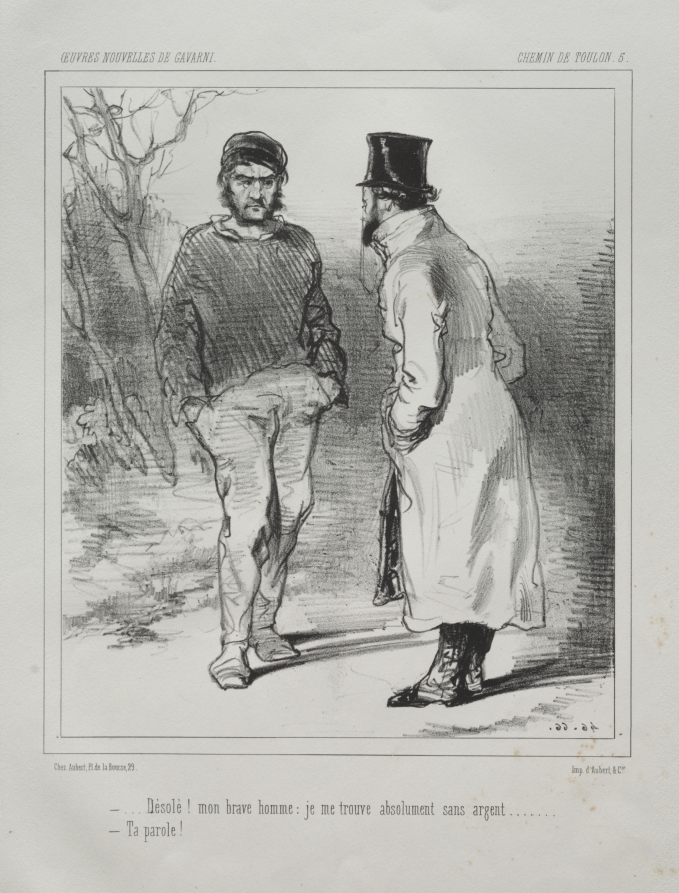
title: Chemin de Toulon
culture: France, 19th century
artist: Paul Gavarni (French, 1804–1866)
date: c. 1846–47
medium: lithograph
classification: Print